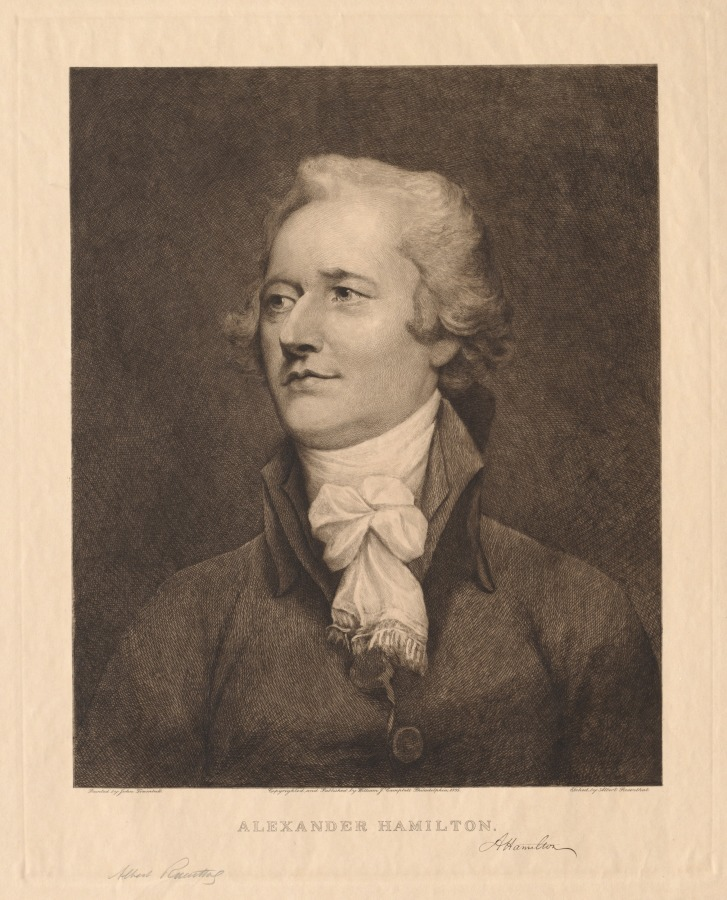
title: Alexander Hamilton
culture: America, late 19th Century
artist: Albert Rosenthal (American, 1863–1939)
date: 1895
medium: etching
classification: Print